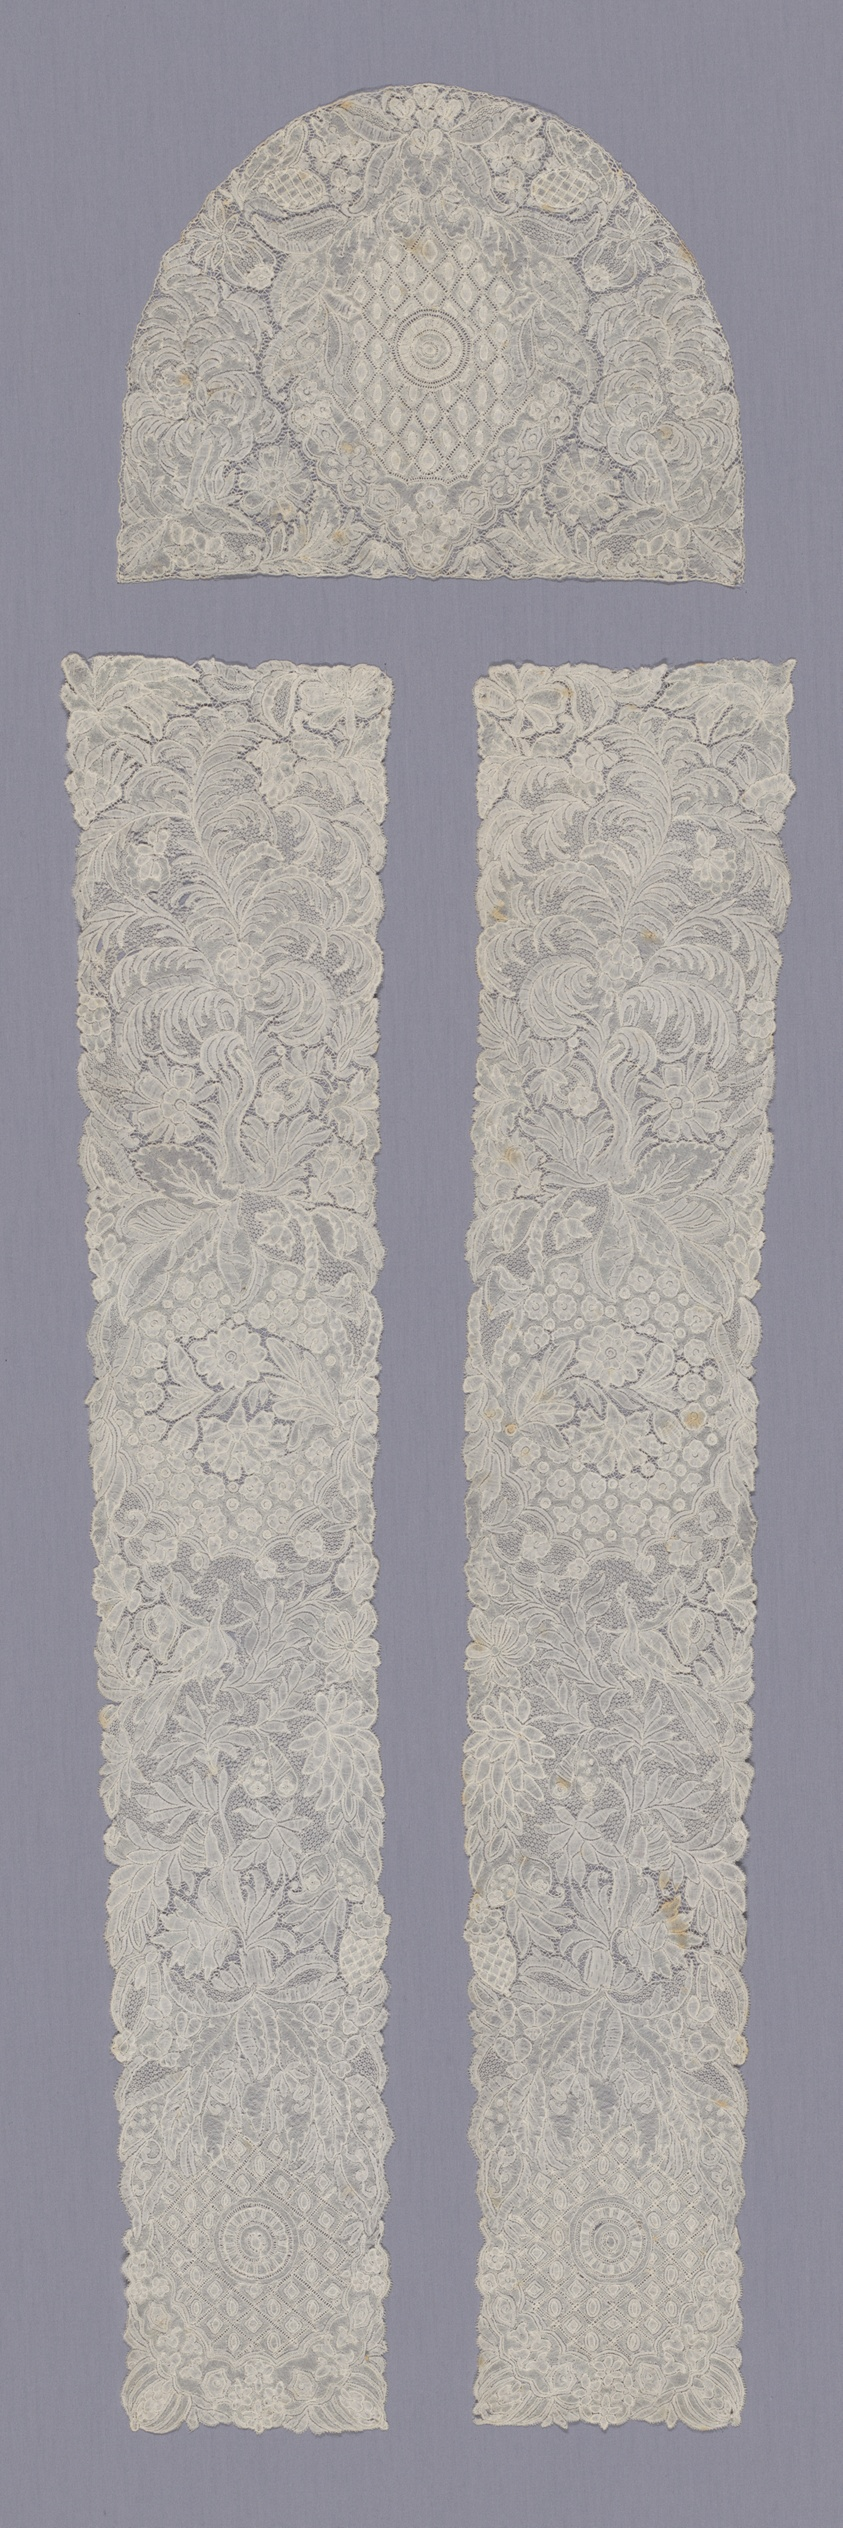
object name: Costume and Accessories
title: Cap Crown and a Pair of Lappets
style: 18th Century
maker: Flanders, Brussels (modern day Belgium)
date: 1720s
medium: Linen, bobbin part lace of a type known as "Brussels"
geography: Flanders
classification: costume accessory; lace - bobbin; lace; textile; costume - lace; costume accessory - headdress; costume accessory worn above the waist; headdress; costume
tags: floral motifs, diamond shapes, flowers, foliage